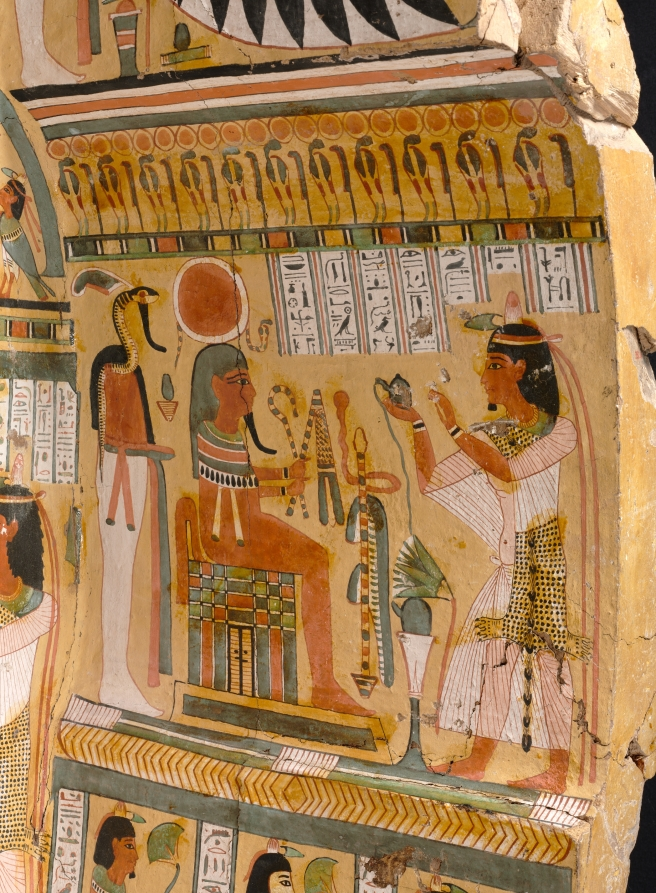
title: Coffin of Nesykhonsu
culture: Egypt, Thebes, Third Intermediate (1069–715 BCE), Dynasties 21–22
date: c. 976–889 BCE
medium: gessoed and painted sycamore fig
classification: Funerary Equipment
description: Egyptian coffins told stories and illustrated spells to help the deceased transition safely to the afterlife. Inside Nesykhonsu's coffin there are two jackals, one facing right and the other left, near the top. Here, the jackal represents the powerful deity Anubis, the god of the afterlife and embalming.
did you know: Two of Nesykhonsu's titles, "Lady of the House" and "Singer of the Choir of Mut the Great," are written on the outside of the coffin.